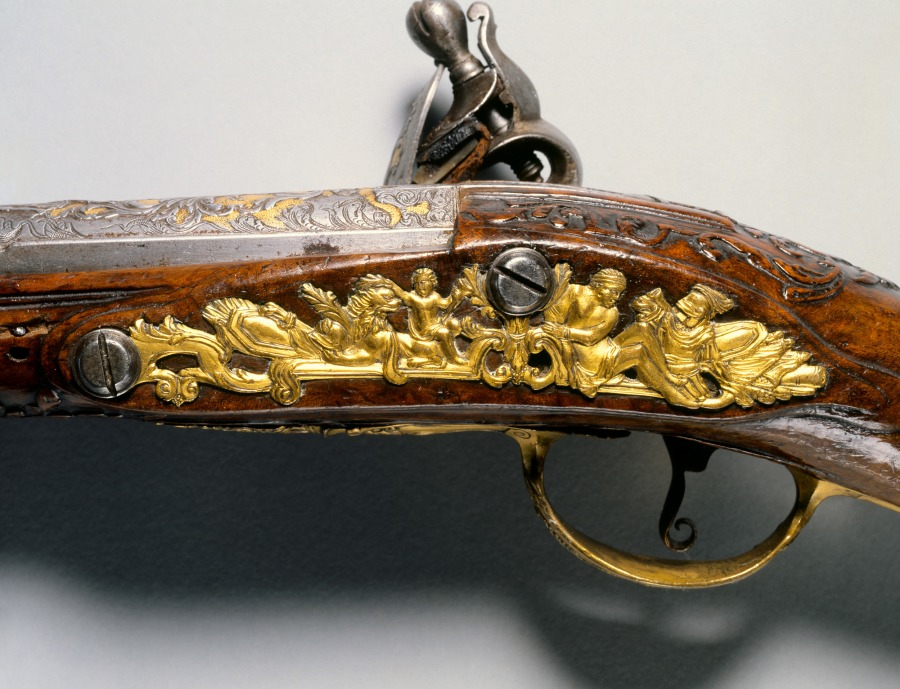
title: Pair of Flintlock Pistols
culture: Franco-Flemish, Liège, early 18th century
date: early 1700s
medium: steel with gold inlay, gilt-brass mounts; walnut burl stock; chiseled high-relief decoration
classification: Arms and Armor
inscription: G. MASSIN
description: Works of exquisite craftsmanship, this pair of pistols, on view in the museum’s armor court, feature an array of decorative elements, including carved walnut, gold inlay, and chiseled, engraved, and gilded figural designs. The barrel is signed G. MASSIN, the name of a gunsmith working in eastern France or French-speaking Flanders, possibly the city of Liège.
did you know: The flintlock ignition system was developed in the 1600s and remained the dominant system until the early 1800s.